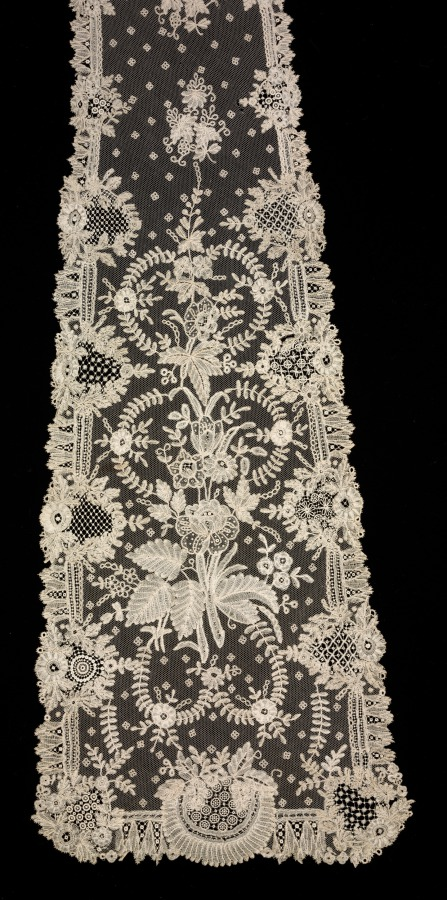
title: Fichu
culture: France or Belgium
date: c. 1875–80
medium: Composite lace. Machine-made netting (reseau), Brussels bobbin lace and French needle point lace; linen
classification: Lace